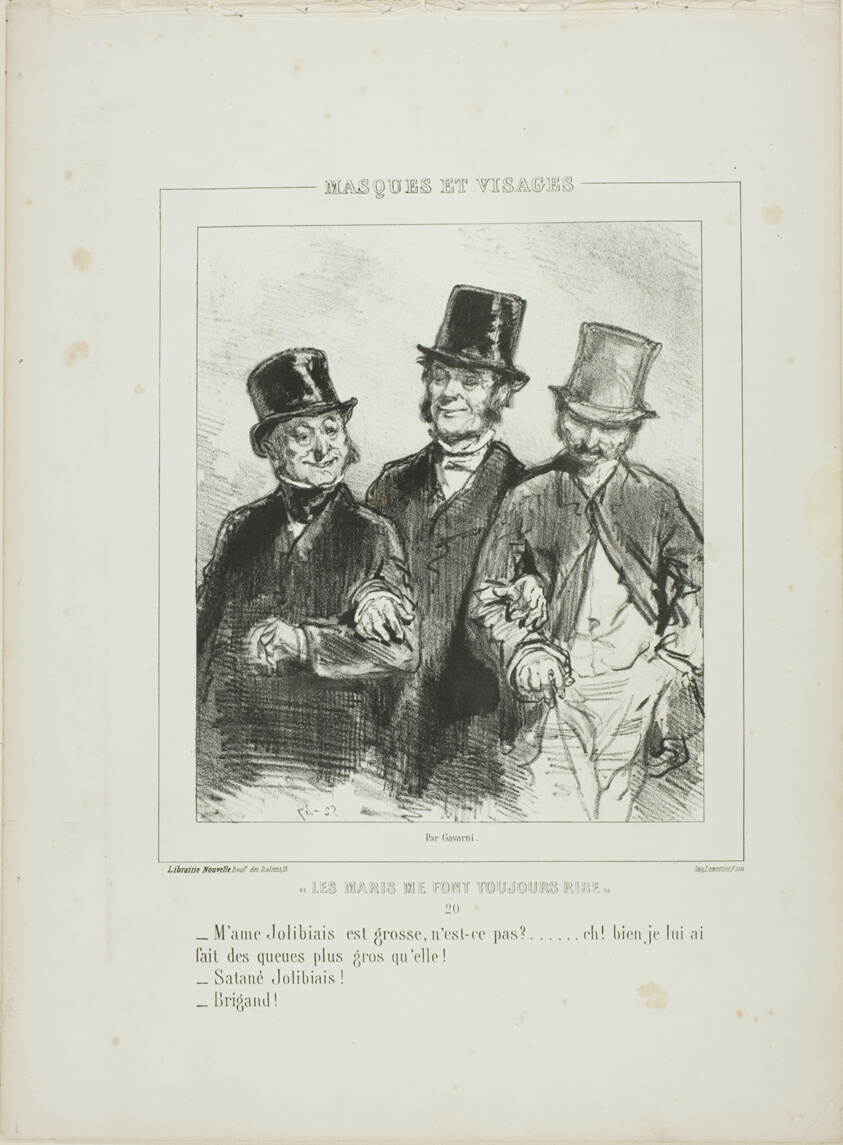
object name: Print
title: Les maris me font toujours rire: M'ame Jolibiais est grosse...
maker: Paul Gavarni (French, 1804-1866)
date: 1853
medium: Lithograph in black on cream wove paper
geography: France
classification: lithograph; print; prints and drawing